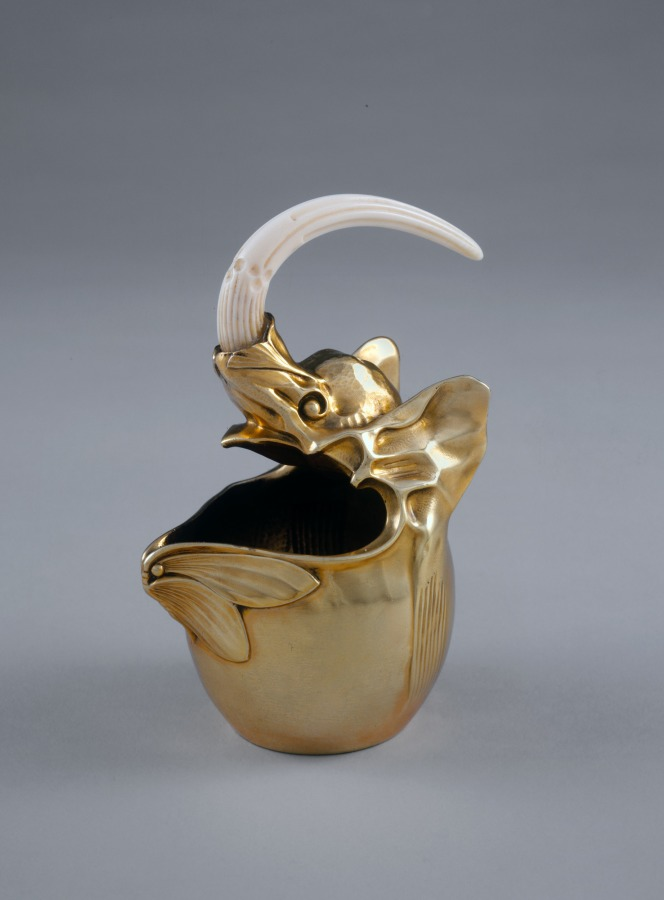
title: Creamer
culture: France, Paris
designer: Carlo Bugatti (Italian, 1856–1940)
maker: Adrien-Aurélien Hebrard (French, 1866–1937)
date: c. 1907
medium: Gilt silver and ivory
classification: Silver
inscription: Made by A. A. Hebrard Firm, Paris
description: This tea and coffee service, salver, and table, together with some now missing cups, were all designed by Carlo Bugatti as an ensemble and presented at the 1902 exposition devoted to decorative arts in Turin, Italy. The set was probably acquired from Bugatti's 1907 exhibition at the Galerie Hébrard in Paris by a wealthy South African widow, Anna Blake, who was living there at the time. Some of the animal and insect motifs suggest mythical beasts or the fossils of prehistoric animals. When Mrs. Blake returned to Cape Town, she took these and other pieces designed by Bugatti with her, and they remained in South Africa throughout her lifetime.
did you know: This creamer is part of a tea and coffee service designed by Carlo Bugatti.